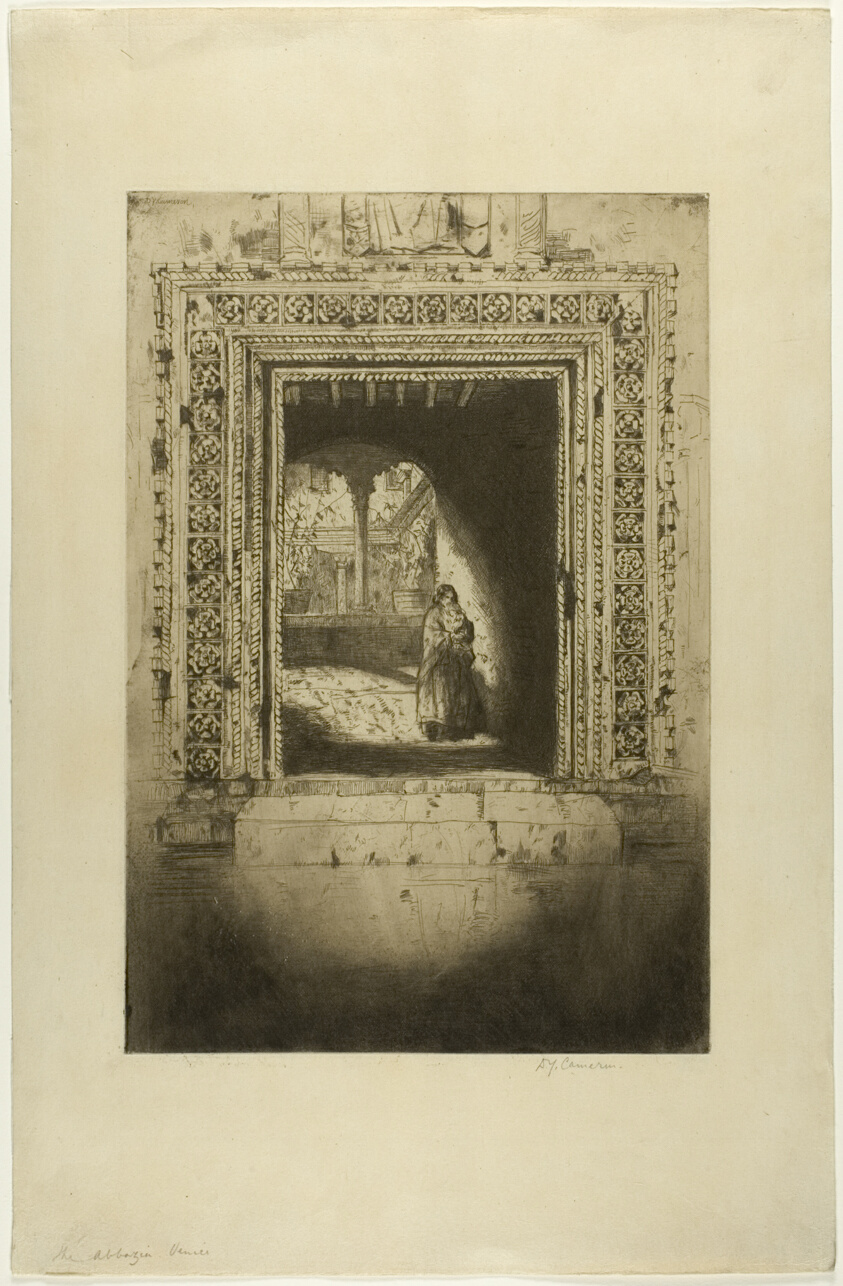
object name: Print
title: The Abbazia, Venice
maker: David Young Cameron (Scottish, 1865-1945)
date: 1900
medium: Etching and drypoint on cream laid paper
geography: Scotland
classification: etching; print; prints and drawing